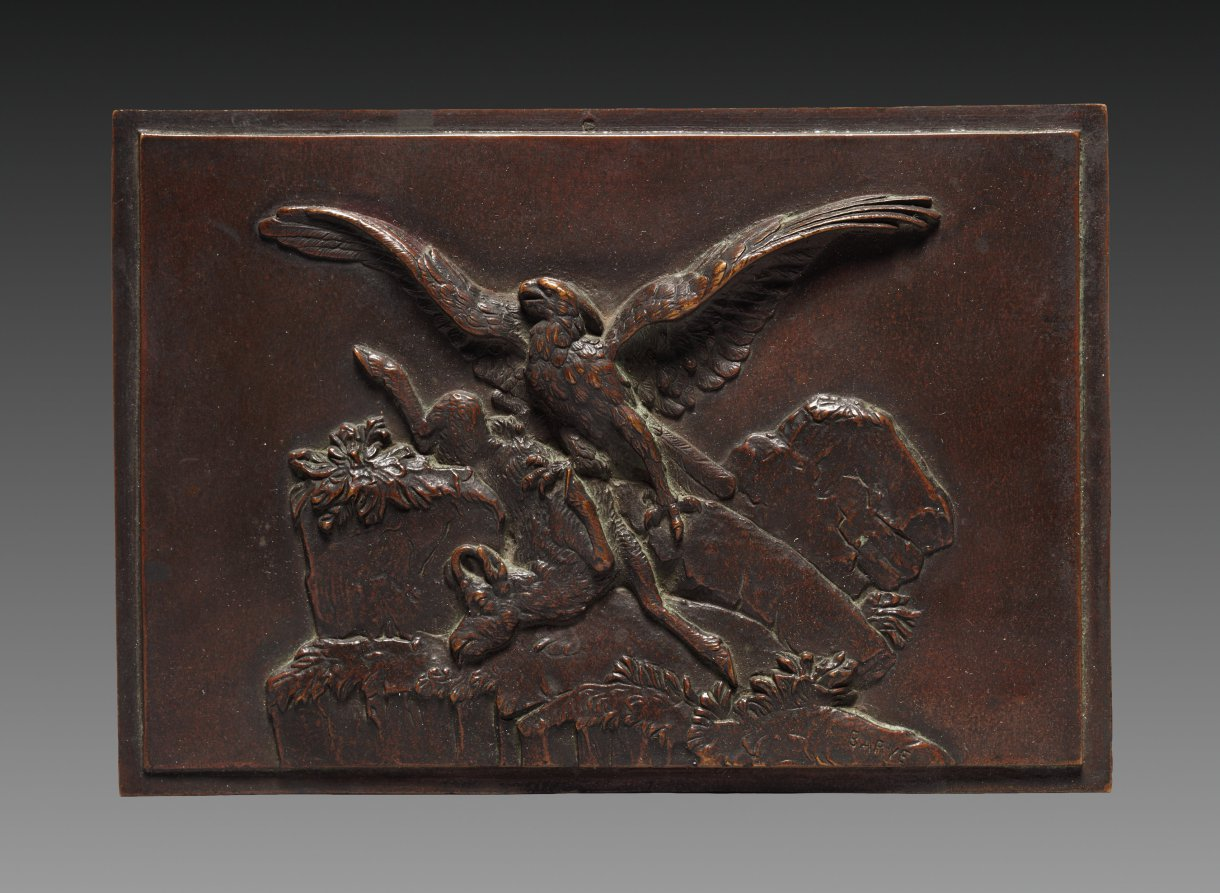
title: Eagle with Chamois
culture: France, 19th century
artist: Antoine-Louis Barye (French, 1796–1875)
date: c. 1830 – 1875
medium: bronze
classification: Sculpture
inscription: Signed: "Barye"